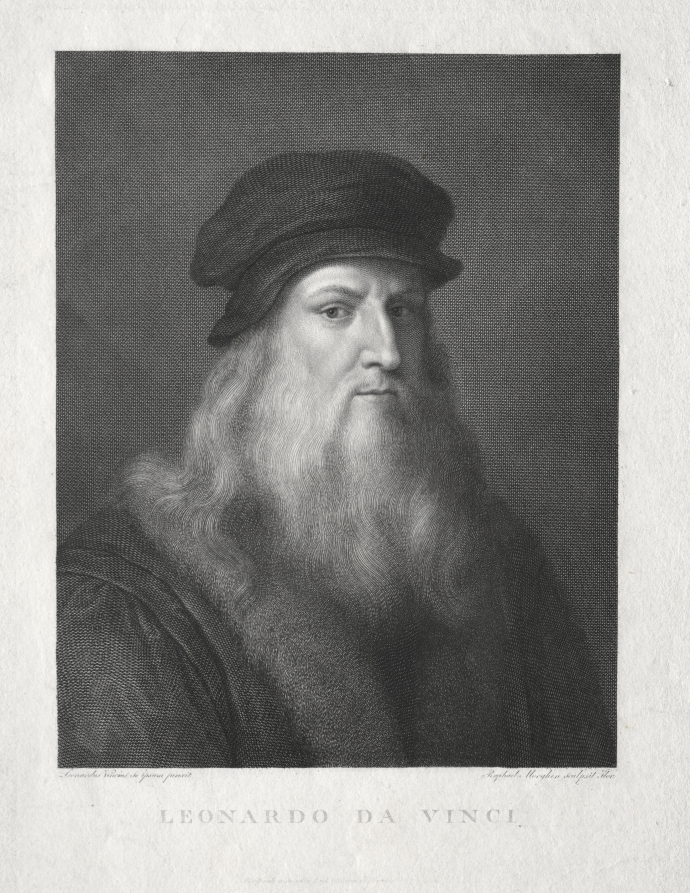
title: Leonardo da Vinci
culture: Italy, 18th-19th century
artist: Raffaello Morghen (Italian, 1761–1833)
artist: after Leonardo da Vinci (Italian, 1452–1519)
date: 1817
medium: engraving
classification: Print